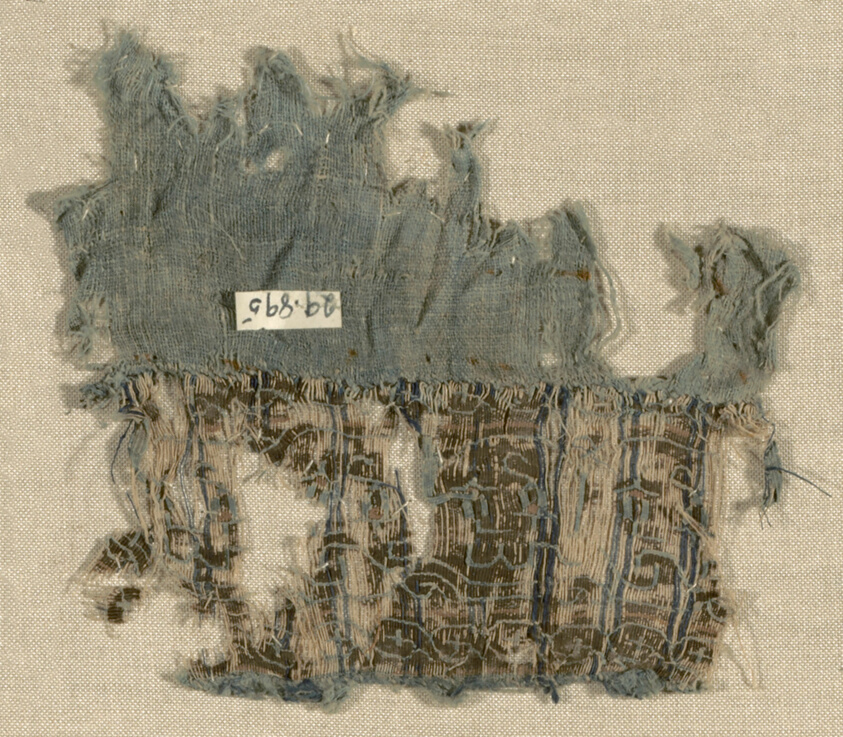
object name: Textile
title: Fragment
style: fatimid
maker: Egypt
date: Fatimid period (969–1171)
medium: Linen and silk, tapestry weave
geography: Egypt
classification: textile; weaving